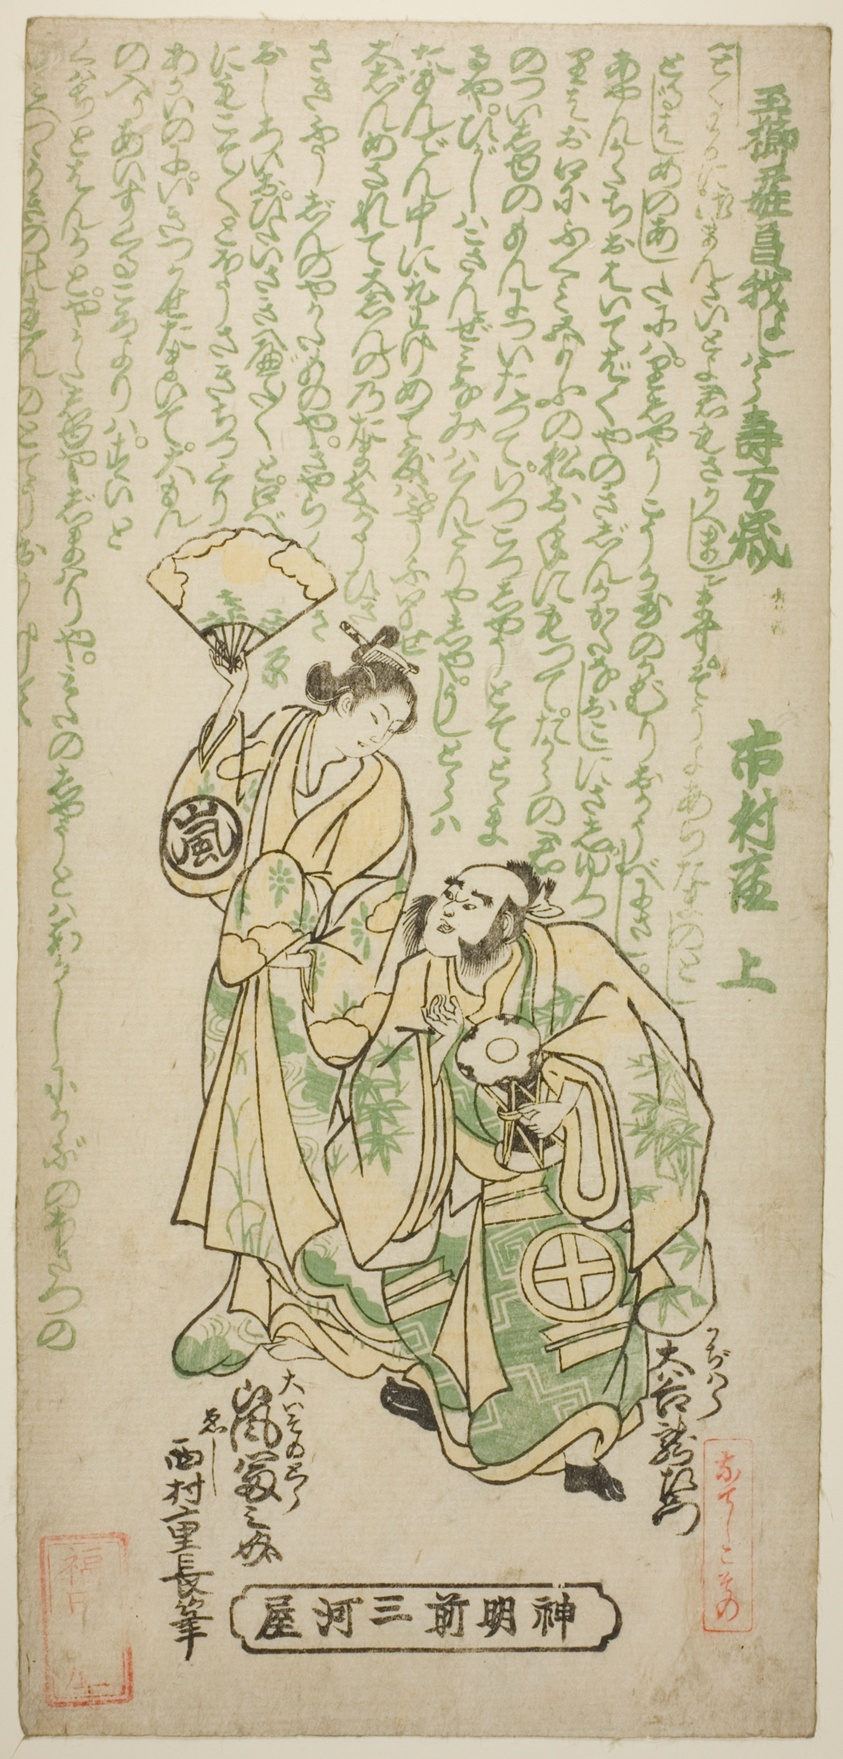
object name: Print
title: The Actors Otani Ryuzaemon II as Kajiwara Genta and Arashi Tominosuke I as Oiso no Tora in the play "Tamagushi Yosooi Soga," performed at the Ichimura Theater in the first month, 1747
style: Japanese (culture or style)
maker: Nishimura Shigenaga (Japanese, 1697 (?)-1756)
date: 1747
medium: Color woodblock print; hosoban, benizuri-e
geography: Japan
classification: woodblock print; print; asian art